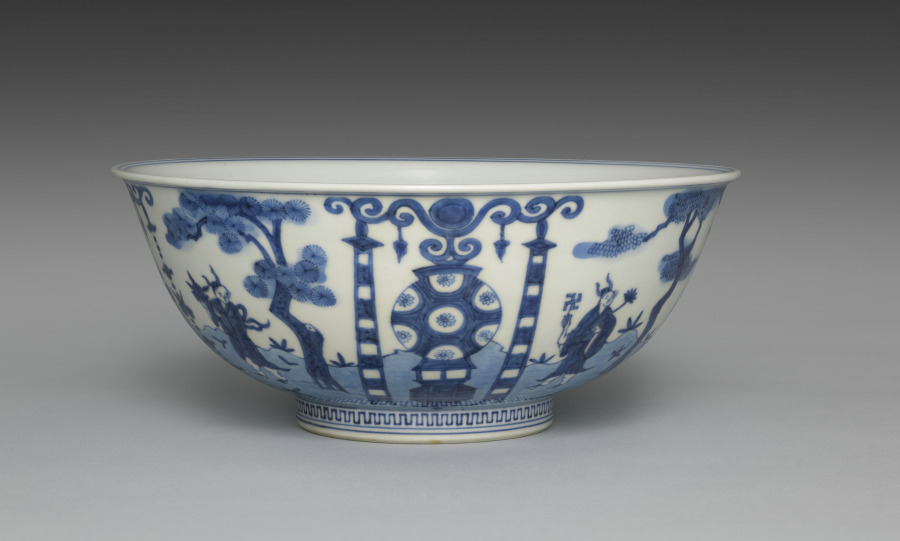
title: Bowl from Nesting Bowls with Daoist Immortals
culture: Japan, Meiji period (1868–1912)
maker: Seifū Yohei III (Japanese, 1851–1914)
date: 1893–1914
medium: Outer bowl from a set of three bowls; porcelain with underglaze blue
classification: Ceramic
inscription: 清風与平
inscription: 大日本清風造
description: Yohei III was capable of ink painting–like compositions in underglaze blue, as well as more decorative ones like that on this set of three nesting bowls. Bowls with very similar designs in five colors were produced in the reign of the Wanli emperor (r. 1572–1620) during the Ming dynasty, and Yohei must have had direct access to one of these or to a close copy. A scene of Daoist immortals is presented on the bowls. On each one, the ground plane is defined with a blue wash. Four lanterns are evenly spaced around the bowl. Two are flanked with linked-piece metalwork banners of the seven treasures. The alternate altars are adorned with textile banners. In between them are four immortals, each standing beneath a tree with small plants surrounding his feet. Two of the immortals hold fruit on a tray. Another carries an elixir-filled ewer and a willow branch. The fourth holds a swastika (manji), here an auspicious symbol, and a flower. Curiously, the inscription inside each footring reads “Made by Seifu of Great Japan,” in emulation of the dynasty and reign inscriptions that appear on Chinese ceramics; however, one can also see through the translucent glaze another inscription, “Seifu Yohei,” written in large characters within a double band of blue on the largest bowl.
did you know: In the bottom of each bowl is a scene of two robed immortals who appear to stand on a precipice in a mountainous landscape high in the clouds, with celestial orbs over their heads.